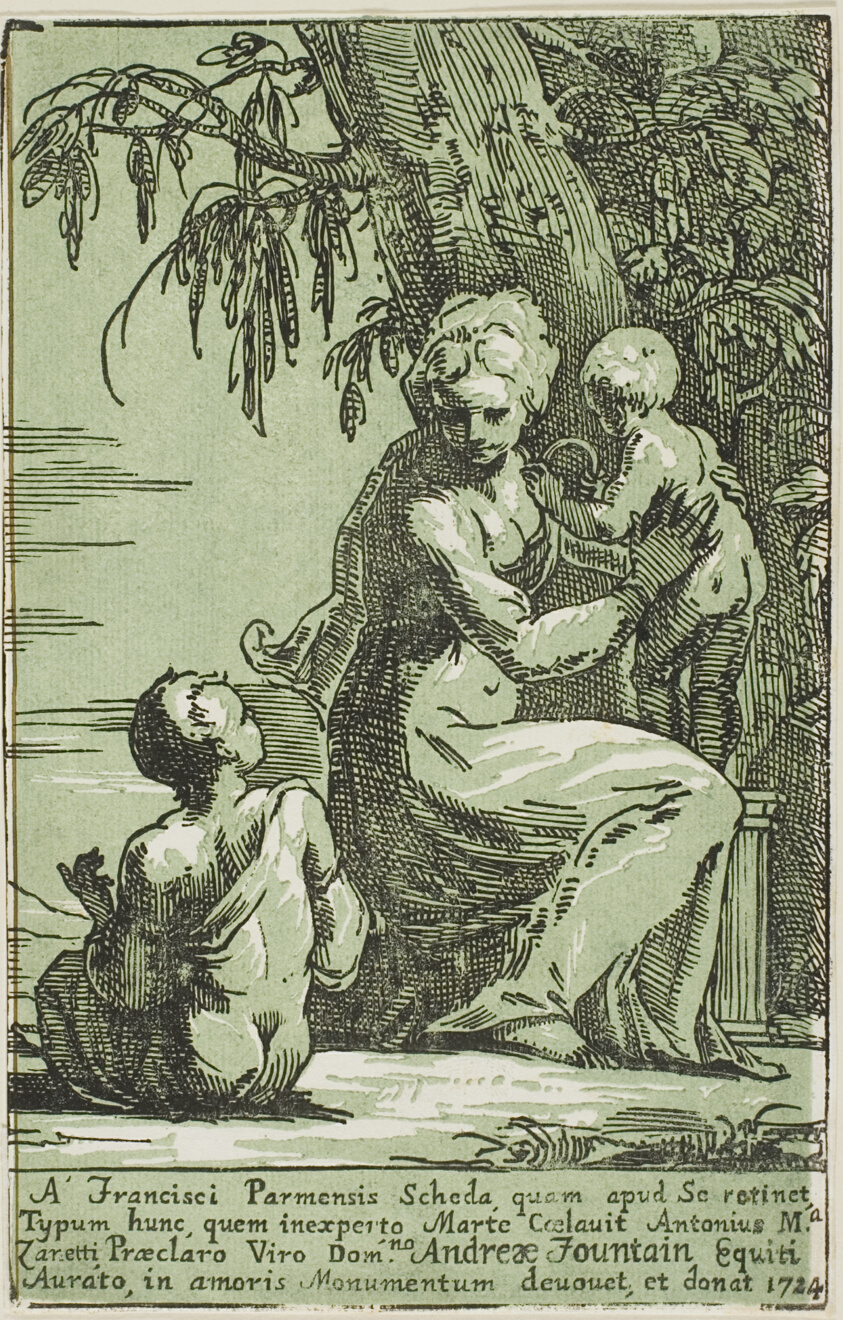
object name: Print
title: A Woman at the Foot of a Tree Holding a Child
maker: Conte Anton Maria Zanetti; Italian, 1680–1767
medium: Chiaroscuro woodcut, from two blocks in black and green, on off-white laid paper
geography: Italy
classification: woodcut; print; prints and drawing